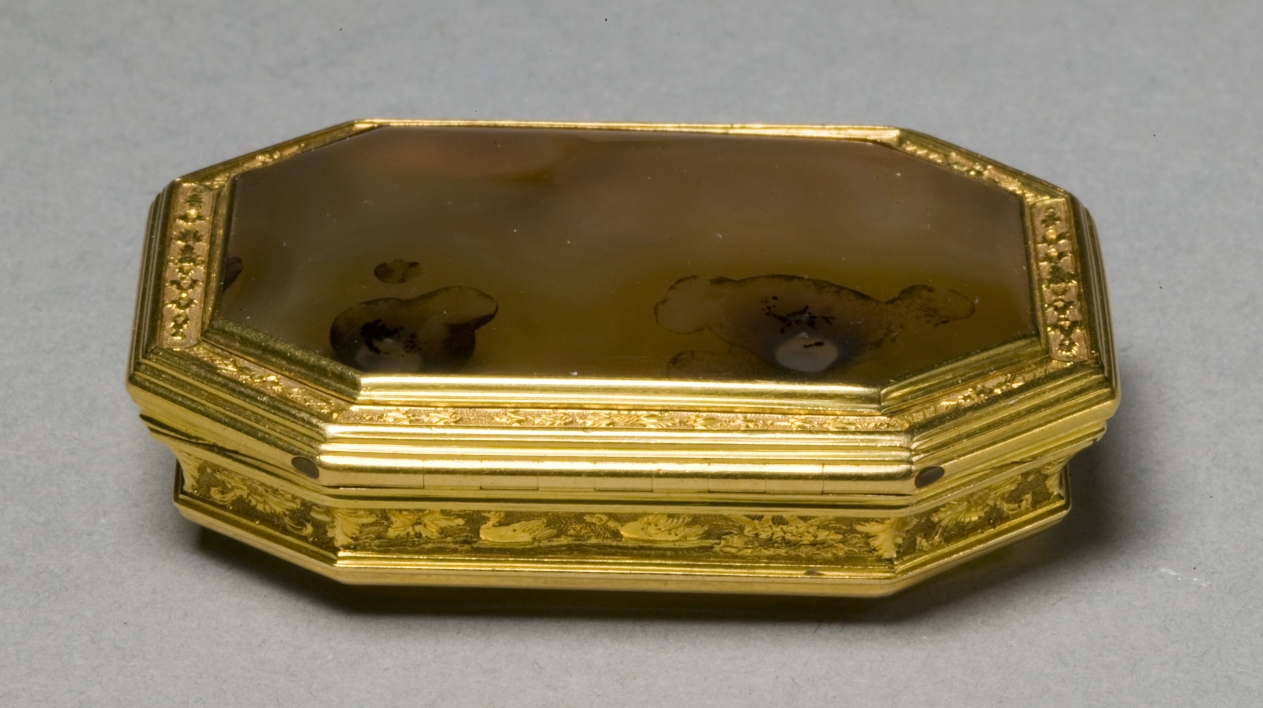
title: Snuff Box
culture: England, early 18th century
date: c. 1730–40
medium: agate with gold mounts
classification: Miscellaneous